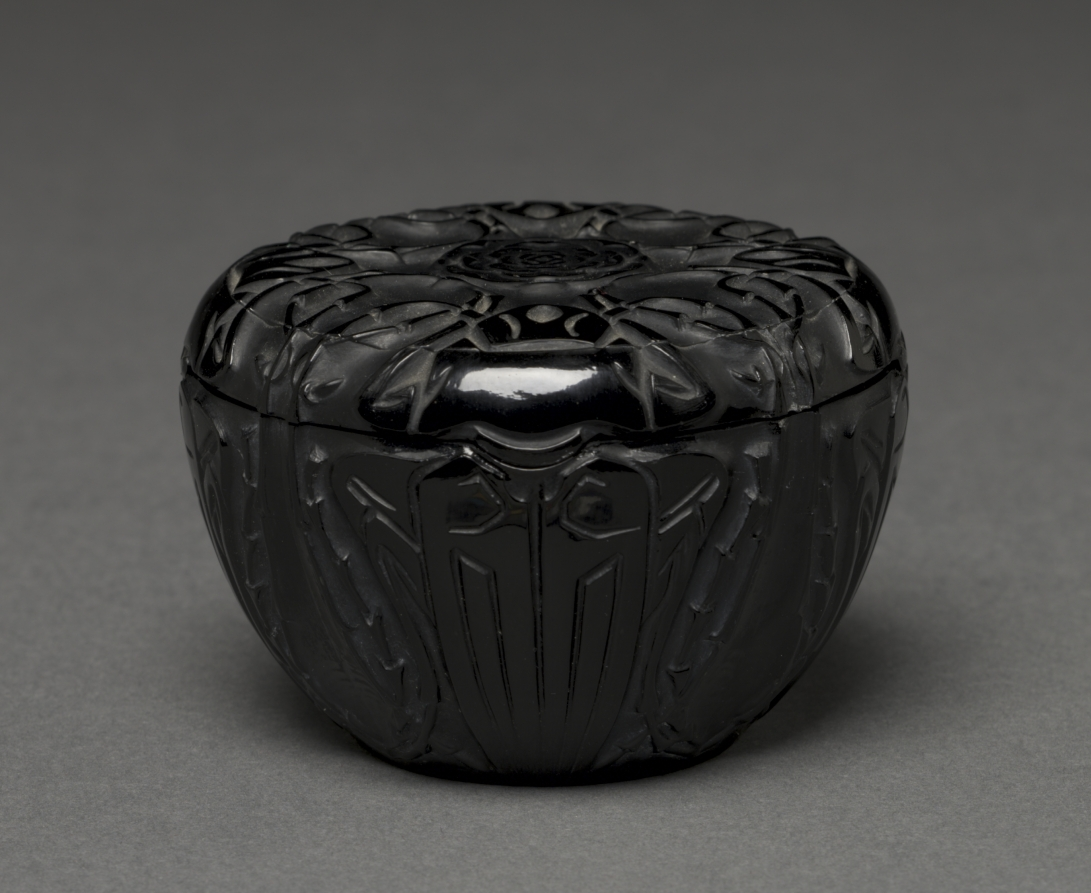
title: Covered Container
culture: France, 20th century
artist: firm of René Lalique (French, 1860–1945)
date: c. 1914–1930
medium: glass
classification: Glass